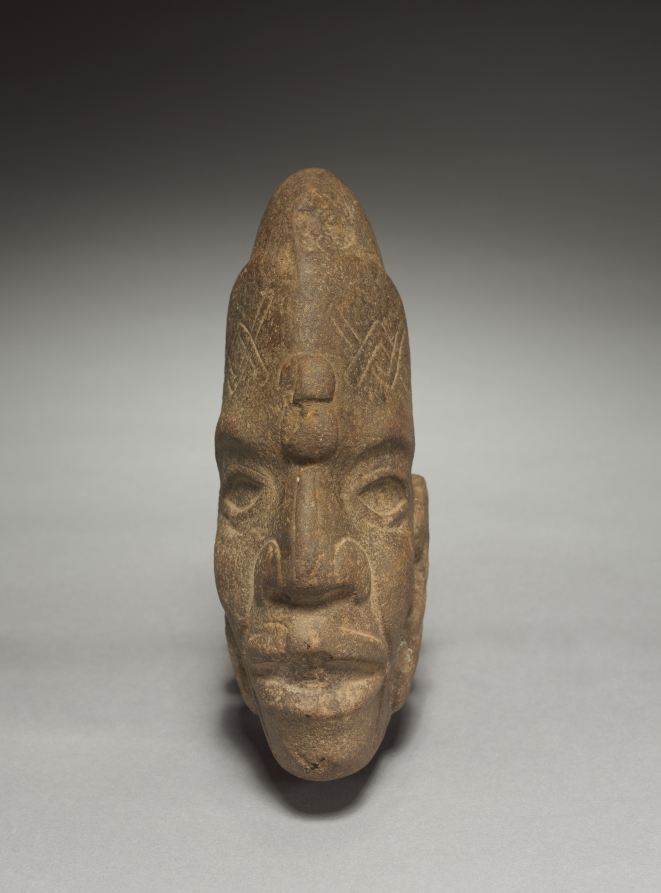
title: Ballgame Thin Stone Head (Hacha)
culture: Mesoamerica, Classic Veracruz style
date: 600–900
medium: stone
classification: Sculpture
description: This enigmatic head is associated with an ancient ballgame played both for sport and ceremonial purposes on Mexico’s Gulf Coast, in present-day Veracruz. It may represent an elite ballplayer or ballgame patron—the forehead is incised with interlaced designs similar to the so-called mat motif, a Maya symbol for rulership. Such heads are known as hachas (Spanish for “axe”) because they often taper to a thin edge at the front, giving them the appearance of axe heads.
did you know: The interlaced designs on this head’s forehead are similar to a Maya symbol for rulership.